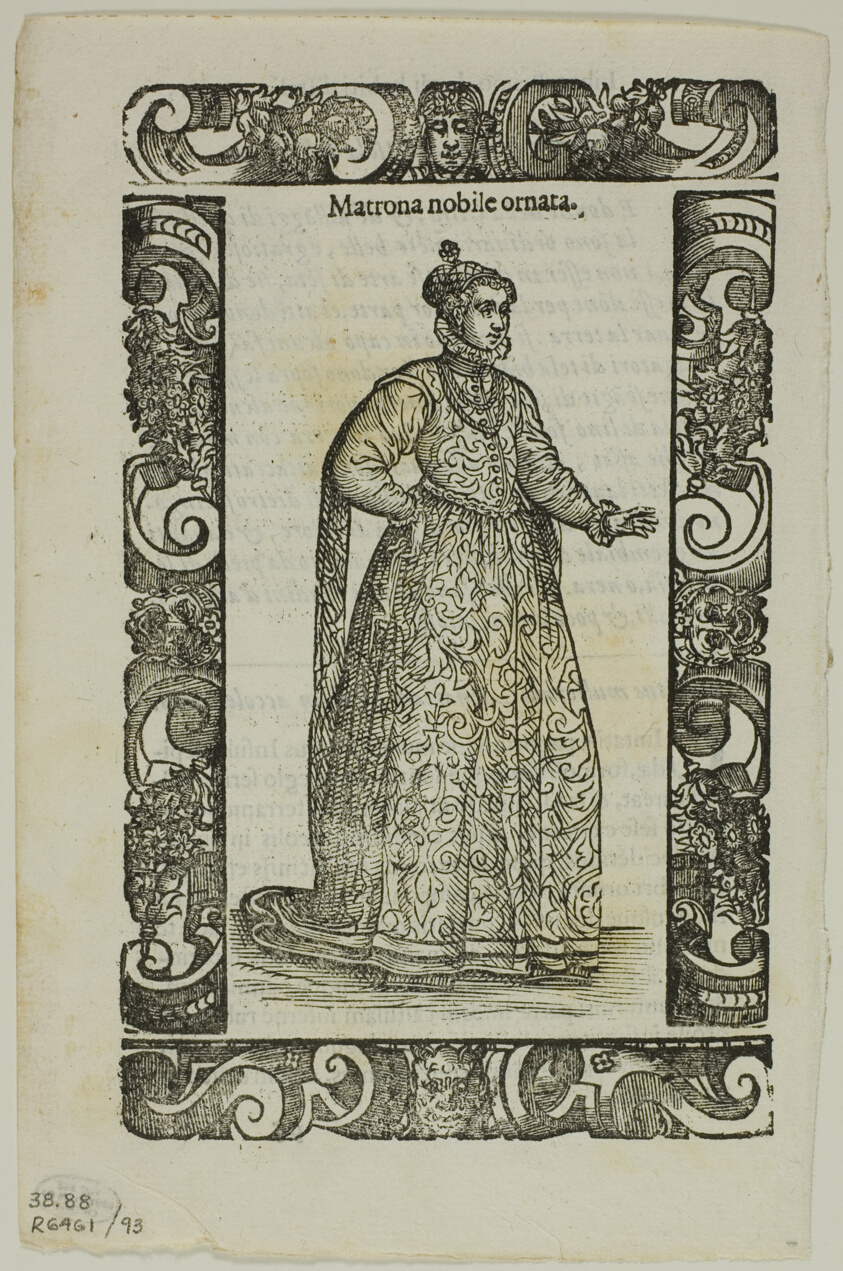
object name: Print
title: Leaf from Habiti antichi e moderni, plate 93 from Woodcuts from Books of the XVI Century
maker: Cesare Vecellio (Italian, c.1521-1601); assembled by Max Geisberg (Swiss, 1875-1943)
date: 1598, assembled into portfolio 1937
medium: Woodcut on paper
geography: Italy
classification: woodcut; print; prints and drawing